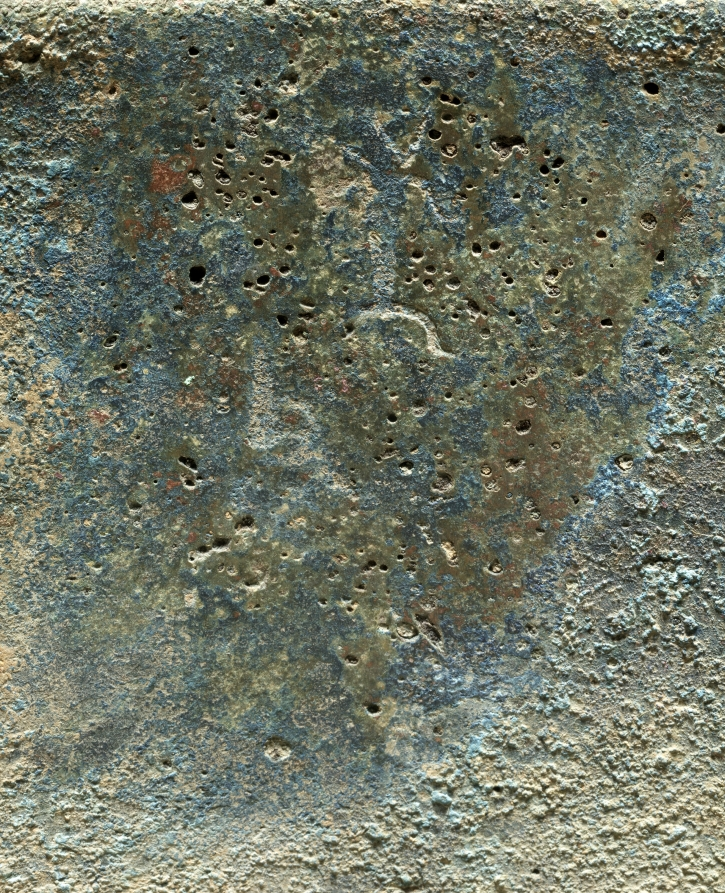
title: Tripod (Ding)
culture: China, Western Zhou dynasty (c. 1046–771 BCE)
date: 1000s BCE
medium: bronze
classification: Metalwork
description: Large and majestic, this tripod gives the effect of overpowering force. Three animal masks (known as taotie) with coiled creatures are aligned in the decorative frieze. With the gaze of the staring eyes, the animal masks assert a religious presence and are meant to instill fear. Bold images of the ram embellish the three legs of the vessel. Bronze cauldrons (ding) like this were made for offerings of food to ancestral spirits in sacrificial and funerary rites performed by the rulers or members of the aristocracy. The ding, in particular, assumed additional significance as the symbol of political power and legitimacy. As signs of status in a stratified society, such highly valued bronzes were cast by its makers with the wish to be "forever treasured for ten thousand years, by sons' sons and grandsons' grandsons."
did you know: Bronze tripods of the ding-type were vessels made in sets of different sizes to be used in rituals, in which grain and meat was offered to the spirits of the ancestors.